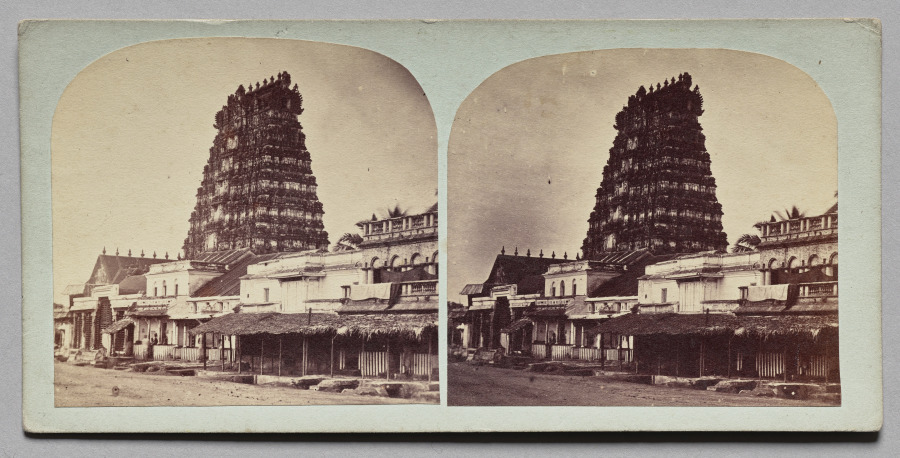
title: Tamil Gateway (Gopura), Tamil Nadu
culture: Unknown, 19th century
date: c. 1860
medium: stereoscopic albumen print from glass plate negative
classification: Photograph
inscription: Written in pencil on verso of mount: “very fine quality photograph £10/c. 1860/4776”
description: A stereograph, when seen through a viewer, produces the illusion of a three-dimensional scene and creates a “you-are-there” sensation. This stereo view documents a Hindu temple in the southern Indian state of Tamil Nadu. The high gopura or gatehouse leading into the temple precinct is characteristic of medieval temples constructed in that region. Popular beginning with their introduction to the public in London in 1851, stereographs inspired a sense of awe that would have compounded a viewer’s impression of India’s architectural wonders.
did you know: Stereographs were introduced to the public in London in 1851 and became wildly popular from the 1860s to around 1930.